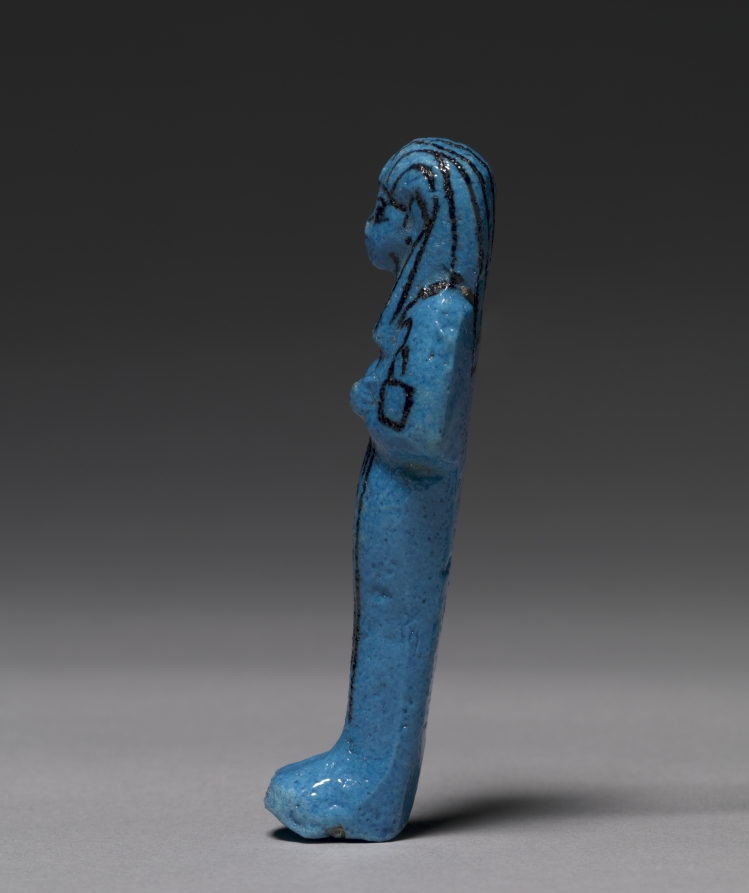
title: Shawabty of Pinudjem I, High Priest of Amen and King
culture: Egypt, Third Intermediate (1069–715 BCE), Dynasty 21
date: c. 990–969 BCE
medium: bright blue faience with purple details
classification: Funerary Equipment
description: This small mummiform funerary figurine was a surrogate for the deceased that performed menial tasks for its owner in the afterlife. Mold-made and decorated with paint, this shawabty contains the name of a king within a cartouche. The vibrant blue color occurs during the firing process as a chemical reaction with the pigments in the faience paste, in this case added copper.